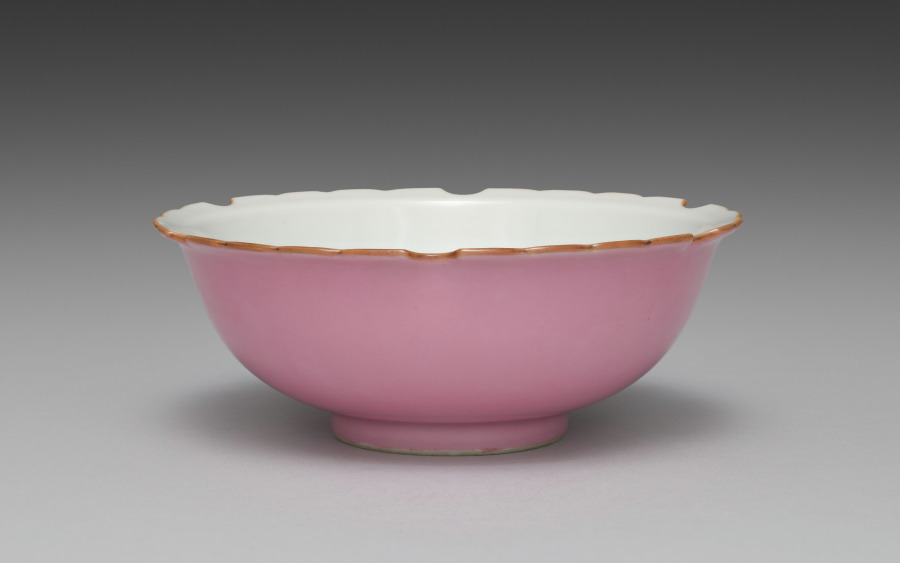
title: Dish from Snow-Flake Side Dishes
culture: Japan, Meiji period (1868–1912)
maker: Seifū Yohei III (Japanese, 1851–1914)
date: 1893–1914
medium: One from a set of six porcelain dishes; porcelain with lobed rims and pink glaze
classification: Ceramic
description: According to the box lid, this set of six side dishes, or mukōzuke, are “snow-flower style” (sekkashiki), having mouths shaped like snowflakes. Their mouths, which have six lobes and scalloped edges, are traced with brown iron oxide at the rim. The outside of each bowl is glazed with a very bright pink over the basin and foot, and the inside is left white. From directly above, one sees a snowflake-like shape, and from the side, they seem to float above a rosy ground.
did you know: The box for this set of dishes has an inscription on the side noting that they were for a person with the family name Nakamoto.